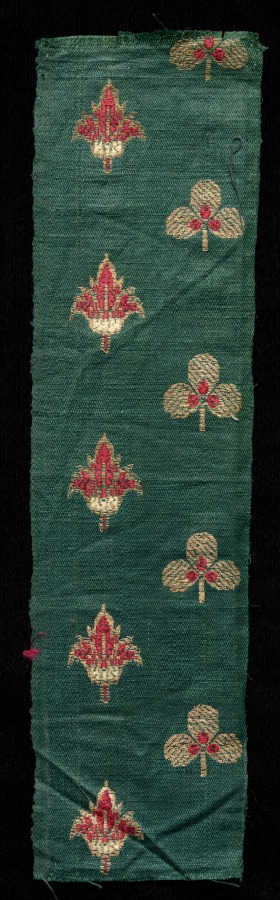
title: Fragment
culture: India, 19th century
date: 1800s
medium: brocade; silk and metal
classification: Textile